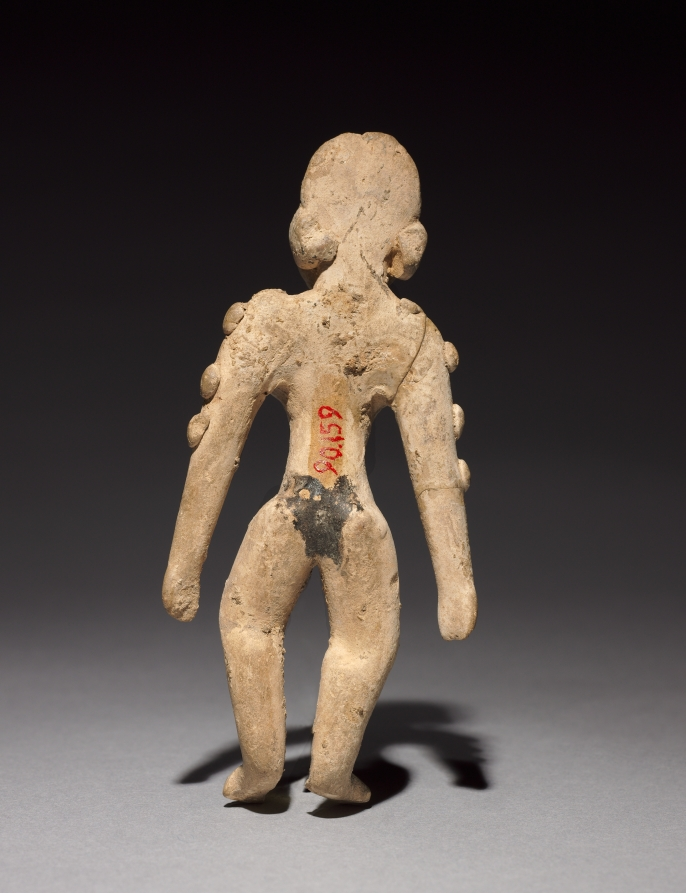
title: Female Figurine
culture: Mesoamerica, Veracruz, Huastec, Panuco Style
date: 300–600 CE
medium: ceramic, pigment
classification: Sculpture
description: Clay was a major medium in ancient Veracruz, located on Mexico’s Gulf Coast, and artists used it to create huge quantities of sculpture ranging from small whistles and figurines like this one to impressive, life-size figural effigies. Meanings are often obscure, but small objects were important enough to have been deposited in tombs and buried offerings.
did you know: Clay figurines were the earliest and most common art form in the ancient Mesoamerican culture region.